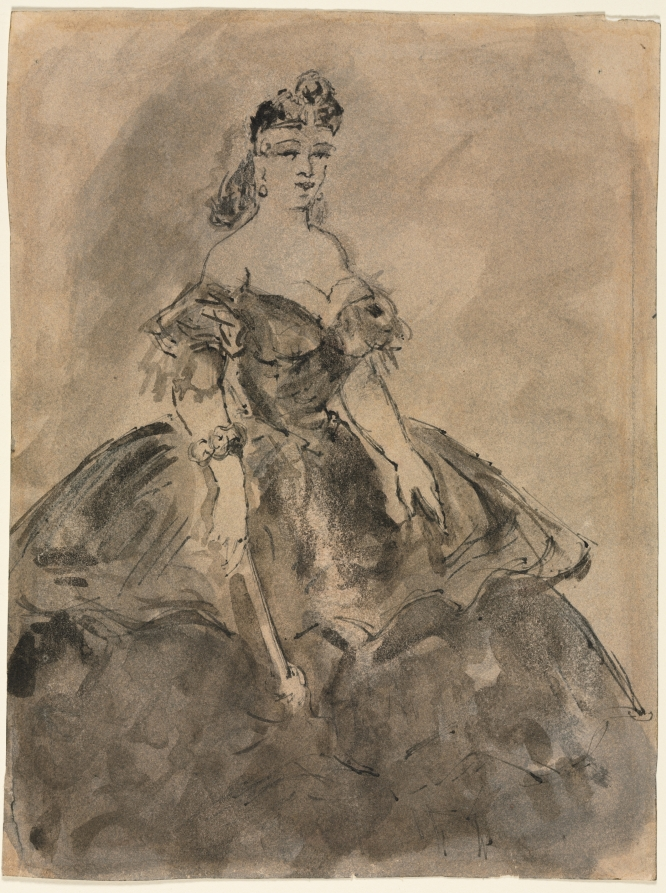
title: At the Ball (recto)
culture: France, 19th century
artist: Constantin Guys (French, 1805–1892)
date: 19th century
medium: pen and black ink and brush and gray wash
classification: Drawing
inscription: VERSO, lower right, in graphite: 16 ; lower right, in graphite: (455